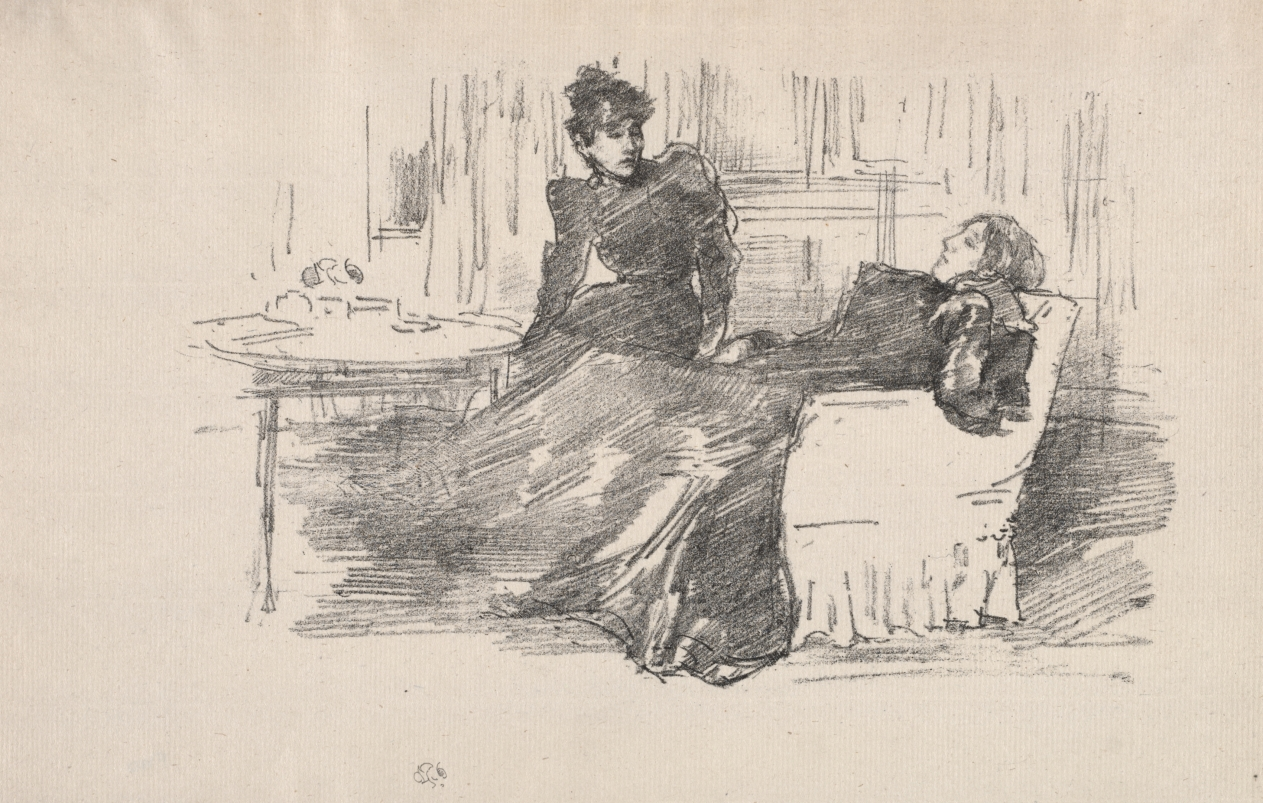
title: The Sisters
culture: America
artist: James McNeill Whistler (American, 1834–1903)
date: 1894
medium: lithograph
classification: Print